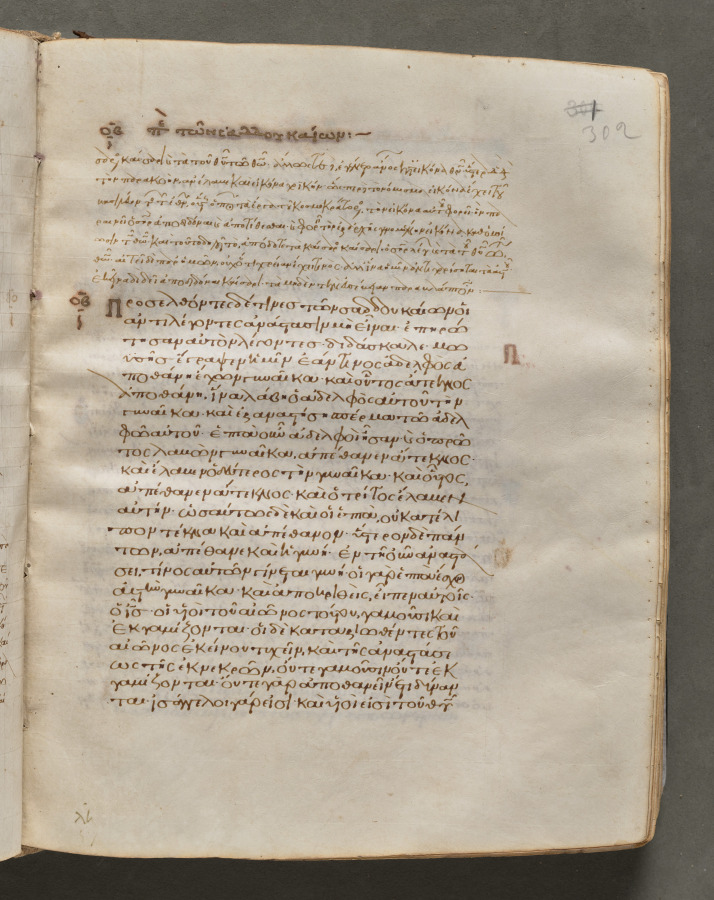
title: Text, folio 302 (recto), from a Gospel Book with Commentaries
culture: Byzantium, Constantinople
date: c. 1000–1100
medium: ink, tempera, and gold on vellum; leather binding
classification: Bound Volume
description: Each of the four gospels in this book opens on a page with brilliantly illuminated borders depicting the author of the text as well as birds—principally peacocks, symbols of the immortality of the soul—and fountains, representing the fountain of life and the salvation of the soul. This volume consists of 428 leaves with texts in Greek. Its level of sophistication suggests that it was probably written and decorated in a monastery in Constantinople.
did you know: Gospel books were carried in procession through Byzantine churches.